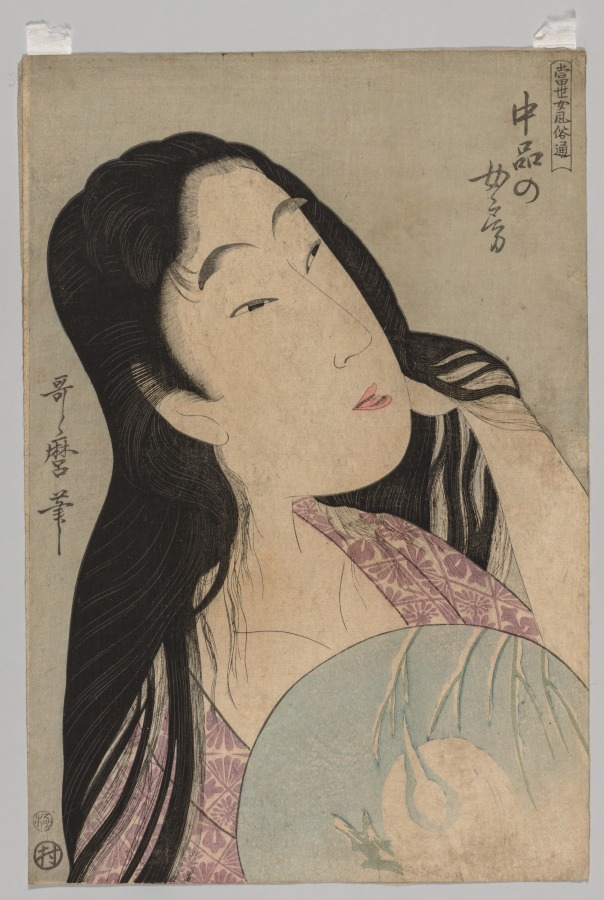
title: Bust of Woman with Loose Hair Holding Fan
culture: Japan, Edo period (1615–1868)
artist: Kitagawa Utamaro (Japanese, c. 1754–1806)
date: 1753–1806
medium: color woodblock print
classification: Print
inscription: Signature: Utamaro gude Publisher Seal: Murataya Jihe